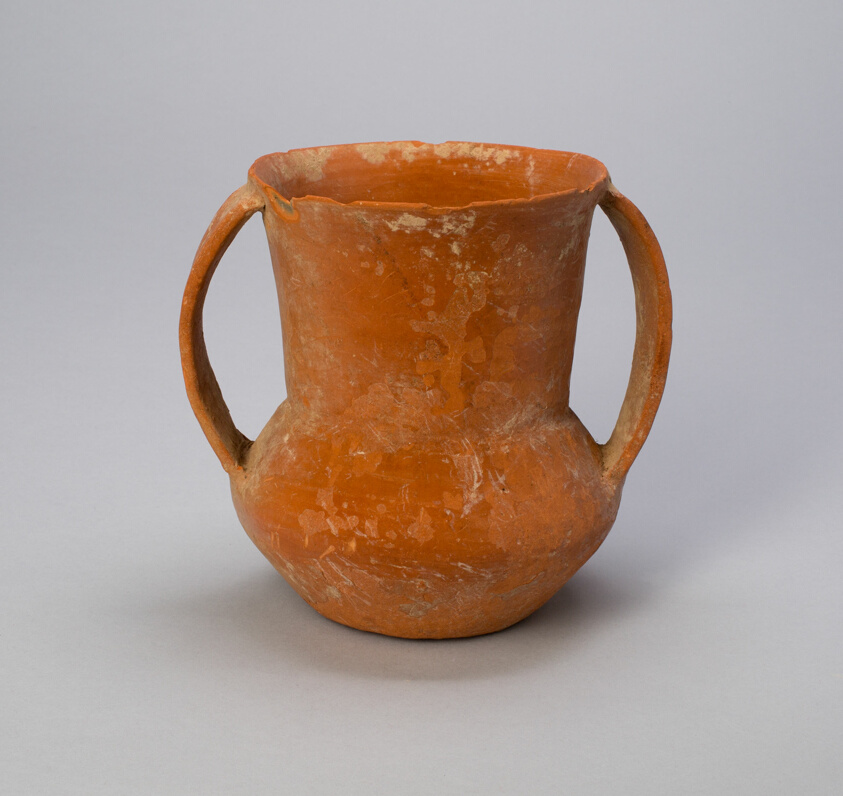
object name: Vessel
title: Double-Handled Jar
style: Chinese (culture or style), qijia, gansu, yangshao, East Asian, asian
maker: China, Gansu province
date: Neolithic period, Qijia culture, c. 2000 B.C.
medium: Brick-red earthenware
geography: China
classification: ceramics; asian art; vessel